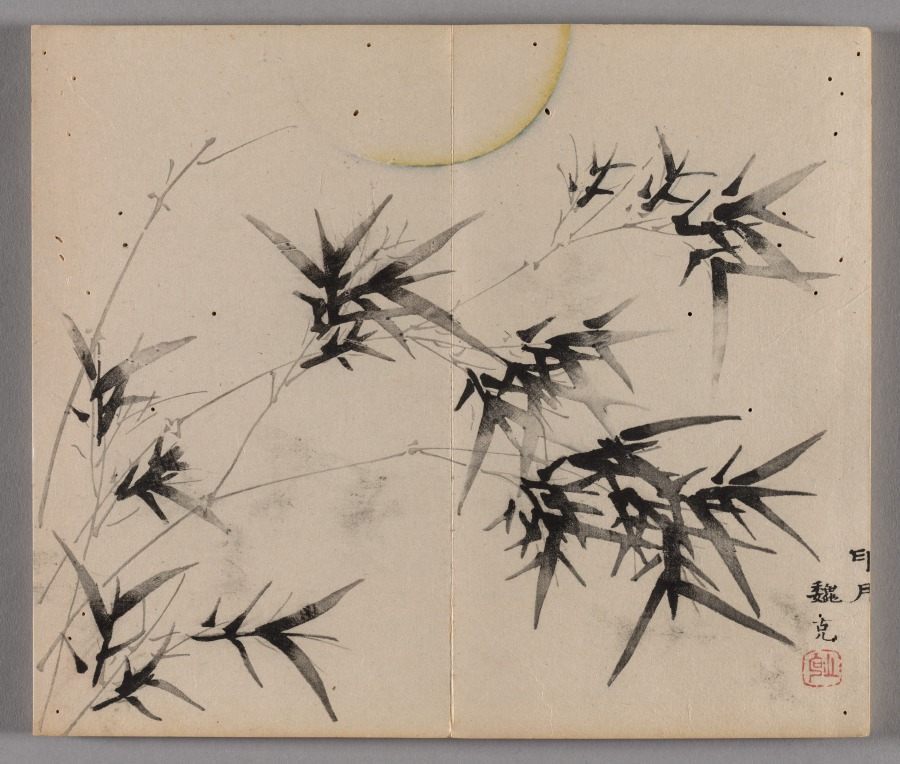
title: Ten Bamboo Studio Painting and Calligraphy Handbook (Shizhuzhai shuhua pu): Bamboo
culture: China, Qing dynasty (1644-1911)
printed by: Hu Zhengyan (Chinese, c. 1584–1674)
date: 1633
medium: Woodblock-printed book; ink and colors on paper; first edition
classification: Print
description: Color printing reached a level of perfection in the early 1600s, as seen in this Ten Bamboo Studio Collection of Calligraphy and Painting and the Mustard Seed Garden Manual of Painting (printed 1679 and 1701). The painterly quality, precision in registering (aligning) the woodblocks, and harmonious colors made them the most successful color print editions in Chinese history. Both editions were printed and compiled in Nanjing, spread nationwide, and had a great impact on the arts in Japan and Korea.